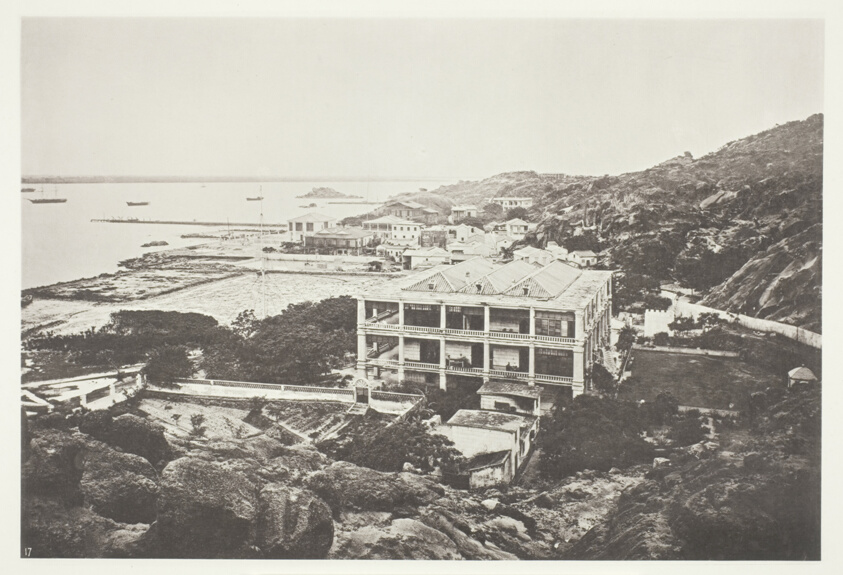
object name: Photograph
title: Swatow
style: 19th century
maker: John Thomson (Scottish, 1837–1921)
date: c. 1868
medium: Collotype, pl. VI from the album "Illustrations of China and its People, Volume II" (1873)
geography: Scotland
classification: photography; photograph